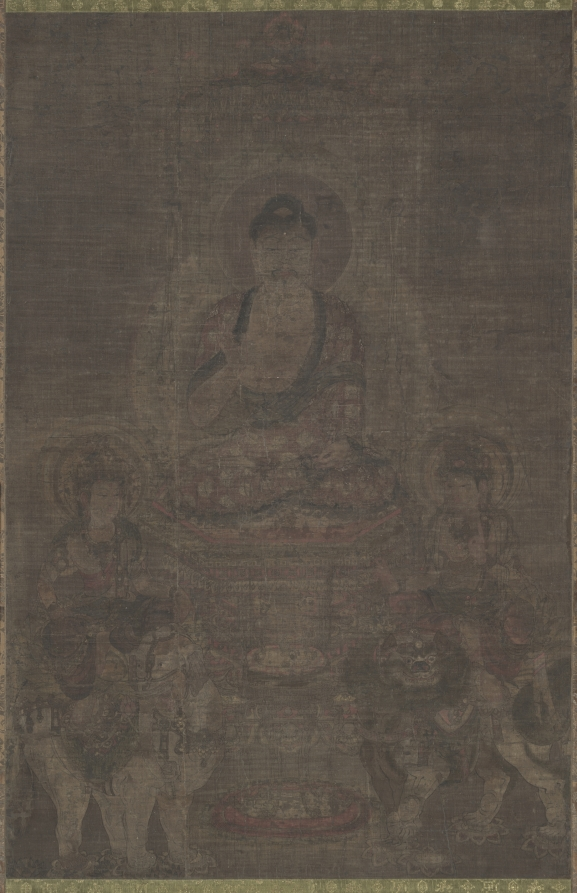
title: Shakyamuni Triad: Buddha Attended by Manjushri and Samantabhadra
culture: China, Tang dynasty (618-907)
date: c. 900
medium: Hanging scroll; ink and color on silk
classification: Painting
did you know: Samantabhadra rides a six-tusked white elephant, while Manjusri is seated upon a lion.